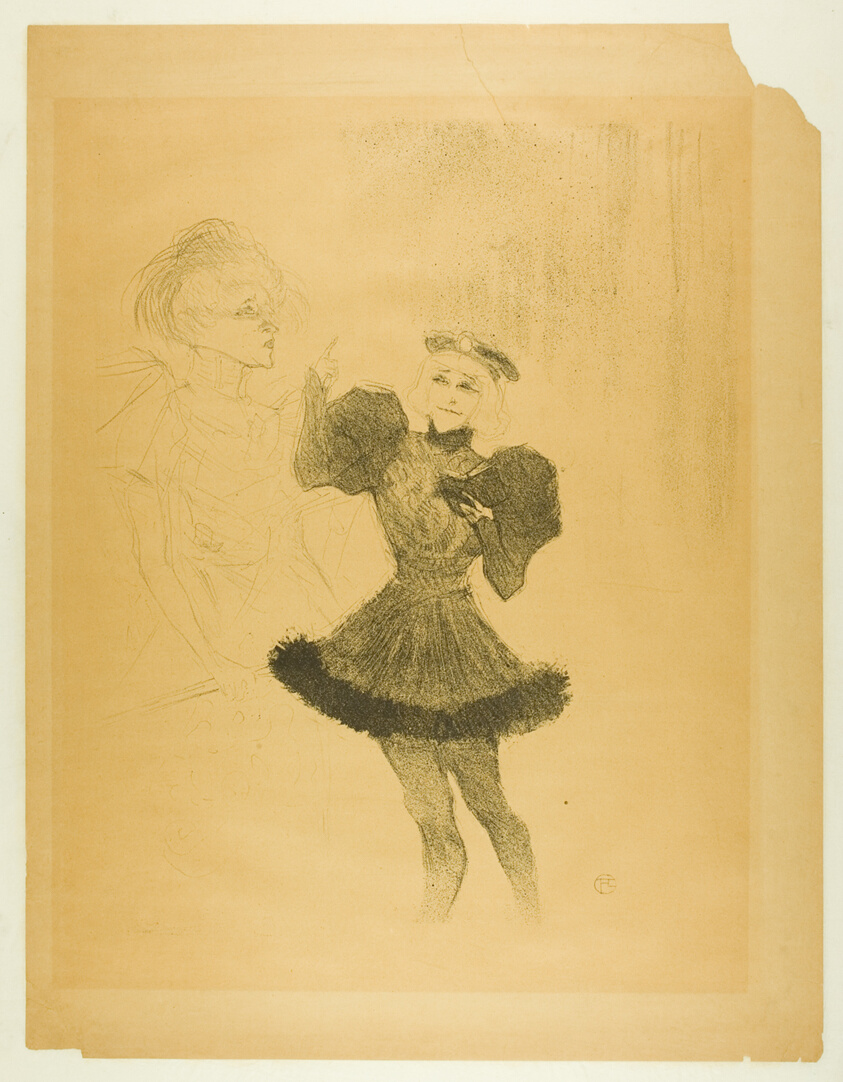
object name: Print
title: Lender and Lavallière, in Le Fils de L'Arétin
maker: Henri de Toulouse-Lautrec (French, 1864-1901)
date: 1895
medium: Lithograph on tan wove paper, laid down on white laid Japanese paper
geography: France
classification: lithograph; print; prints and drawing